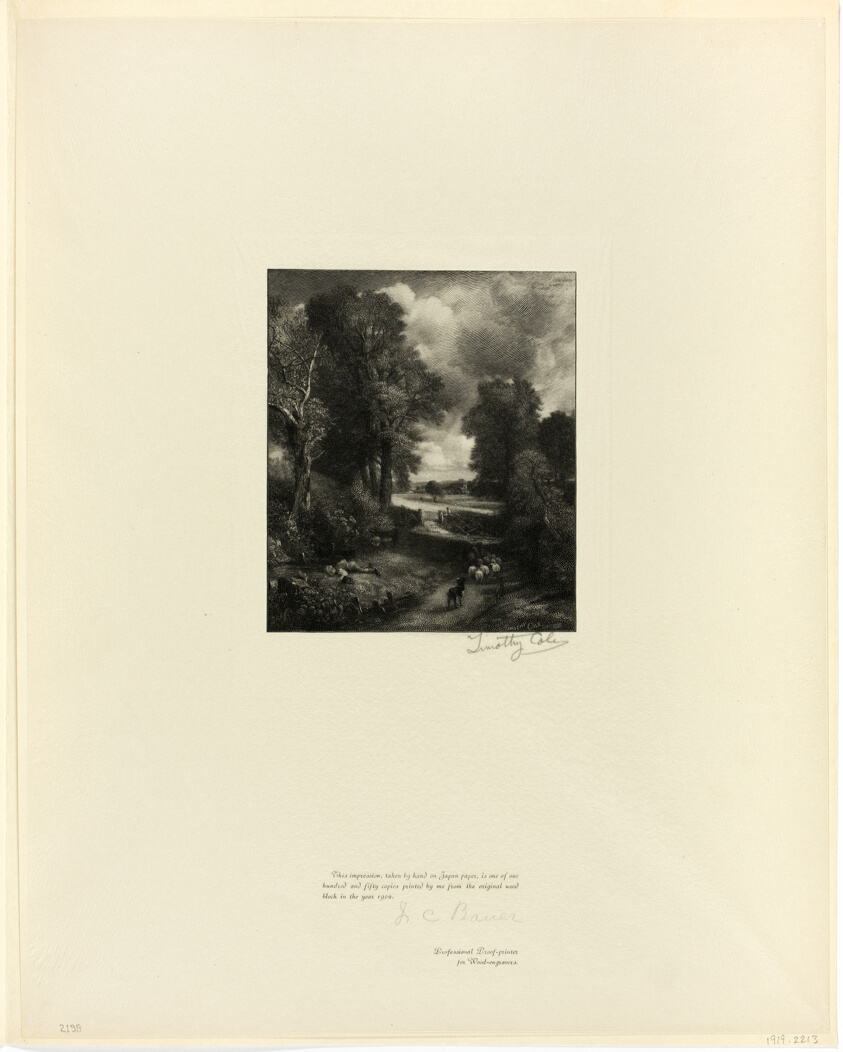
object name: Print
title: The Cornfield, from Old English Masters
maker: Timothy Cole (American, born England, 1852-1931); after John Constable (English, 1776-1837)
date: 1900, printed 1902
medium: Wood engraving on chine paper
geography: United States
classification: wood engraving; print; prints and drawing